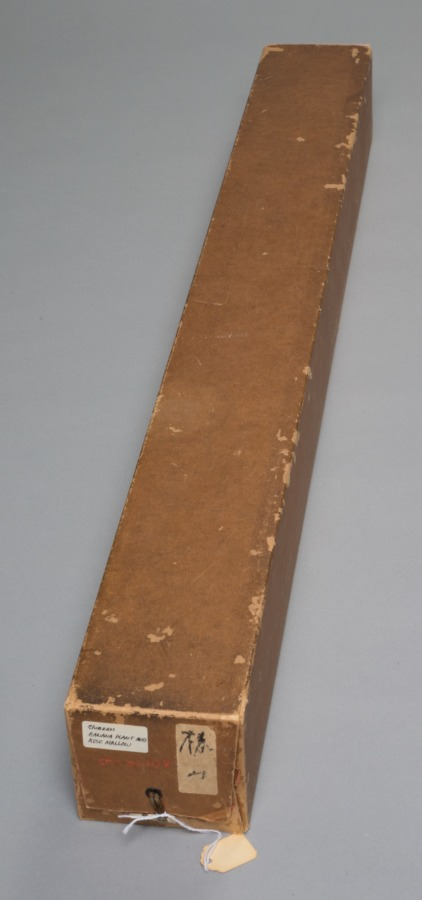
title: Banana Plant and Chrysanthemum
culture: Japan, Edo period (1615–1868)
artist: Tsubaki Chinzan (Japanese, 1801–1854)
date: c. 1820–54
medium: hanging scroll; ink and color on paper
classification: Painting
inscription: artist's inscription and two seals middle right side.